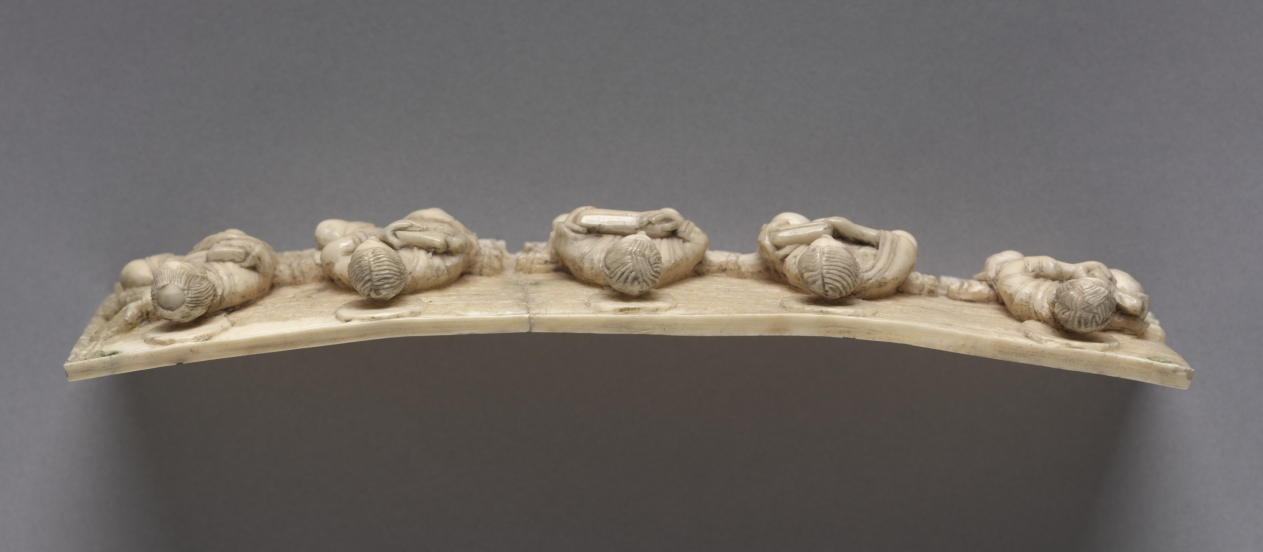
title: Plaque from a Portable Altar Showing Christ and the Apostles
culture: Germany, Lower Rhine Valley, Romanesque period, 11th century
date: 1050–1100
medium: walrus ivory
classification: Ivory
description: This intricately carved ivory panel once decorated the side of a portable altar. One of three plaques, it depicts Christ's apostles and was one of the first major acquisitions of William M. Milliken, the museum's first curator of decorative arts and later director (1930–1958). As Milliken later recalled, the pieces "were immensely intriguing, monumental in scale, even if tiny in size, the Christ in the mandorla could have been enlarged and would have graced the tympanum of a great cathedral."